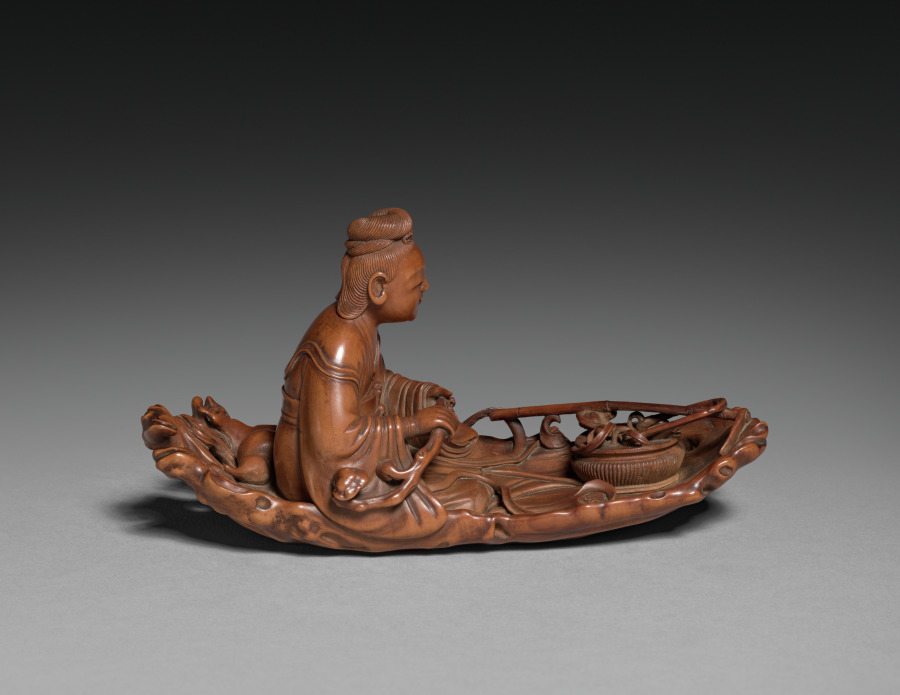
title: Figure of Daoist Immortal He Xiangu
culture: China, Qing dynasty (1644-1911)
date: 1700s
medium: Boxwood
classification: Wood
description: He Xiangu is one of the Eight Immortals in the Daoist pantheon. She was thought to have been a real person who lived in the Tang dynasty, originally named He Qiong. As a teenager, she was instructed in a dream to eat powdered mica to become immune from death and to vow to remain unmarried. She did so and became an enlightened practitioner of Daoism. In this delicate carving, He Xiangu is placidly seated in a gnarled and knotty wooden raft amid green-tinted ivory waves. In front of her rests a bamboo basket filled with objects associated with Daoist immortality, and she holds a branch of lingzhi fungus like an oar.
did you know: The lingzhi she holds is a woody mushroom often used in traditional Chinese medicine and associated with immortality.